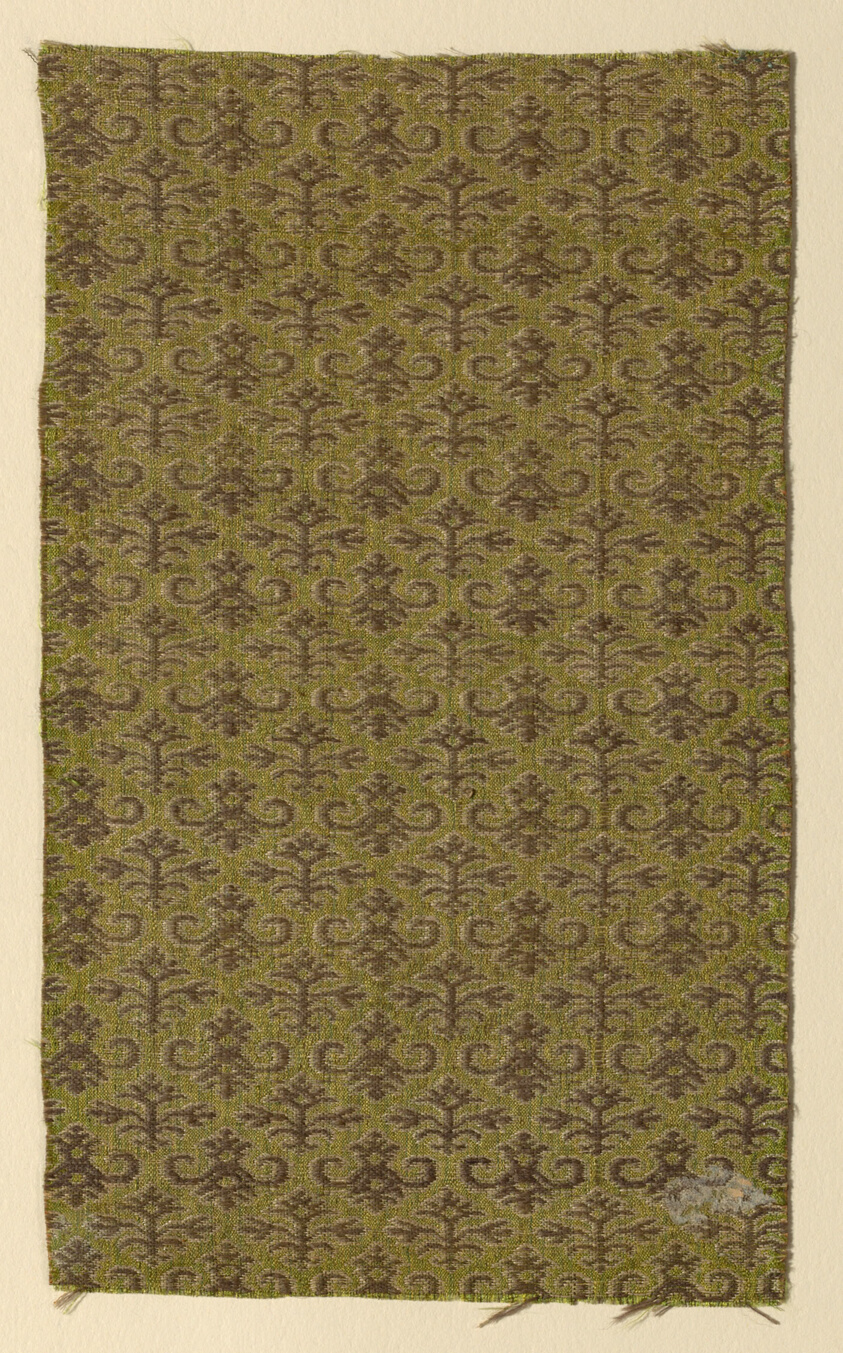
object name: Textile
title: Fragment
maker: Europe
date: 17th century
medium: Linen, compound weave (ie. Beiderwand or Lampas 2:1)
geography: Europe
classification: textile; weaving